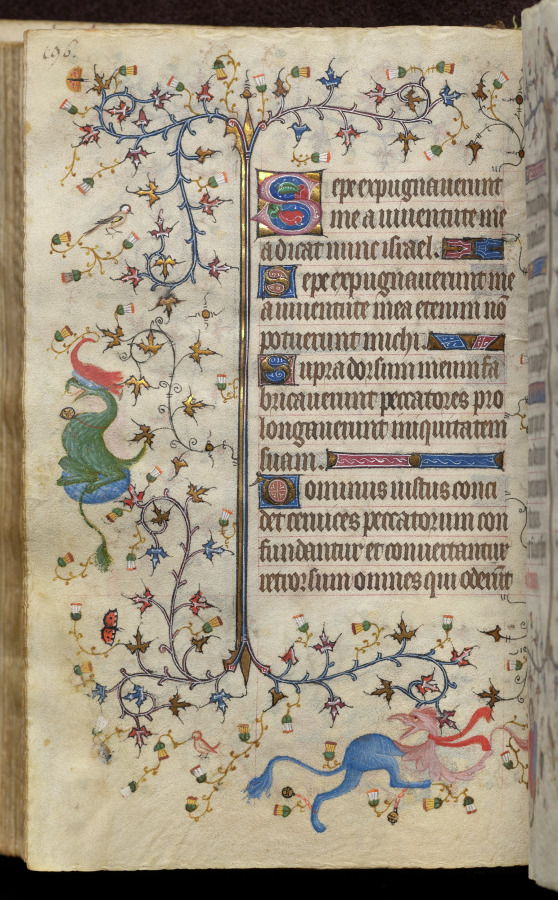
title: Hours of Charles the Noble, King of Navarre (1361-1425): fol. 98v, Text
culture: France, Paris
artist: Master of the Brussels Initials and Associates (French)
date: c. 1405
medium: ink, tempera, and gold on vellum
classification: Bound Volume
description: This precious volume was obviously highly prized by its owner, the French-born King of Navarre, who had his coat of arms painted on no less than twenty folios. Rather than directly commissioning this manuscript from a specific workshop, it seems that Charles the Noble acquired his book of hours -- perhaps ready-made for the luxury market -- while on a trip to Paris in 1404-05. A collaborative effort, six painting styles are evidenced within the pages of this codex, those of two Italians, two Frenchmen, and two Netherlanders. The painter who was responsible for the planning and decoration of the book, and who produced seventeen of the large miniatures, was a Bolognese artist known as the Master of the Brussels Initials. His principal assistant, responsible for most of the borders, was a Florentine who signed his name "Zecho" da Firenze on folio 208 verso.